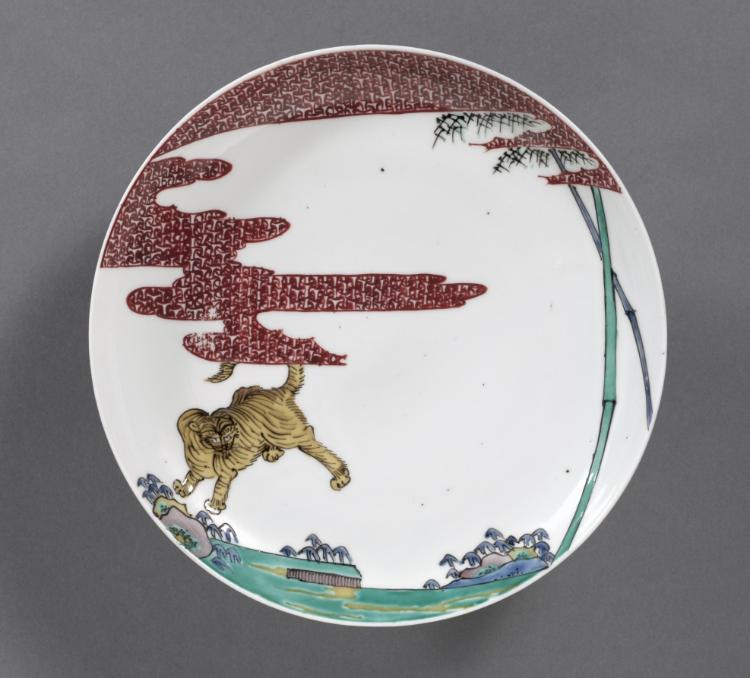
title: Plate with Tiger in Bamboo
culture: Japan, Edo period (1615–1868)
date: c. 1700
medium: Porcelain with overglaze color enamels (Hizen ware, Arita type)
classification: Ceramic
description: This plate expresses an effective coupling of physical form and painted ornament. The artist bent the bamboo stalks on the right and the minimal landscape below to fit the contours of the dish. The tiger is drawn in long, fluid brushstrokes and filled with yellow overglaze enamel, conveying the hairy and striped nature of a tiger’s fur.